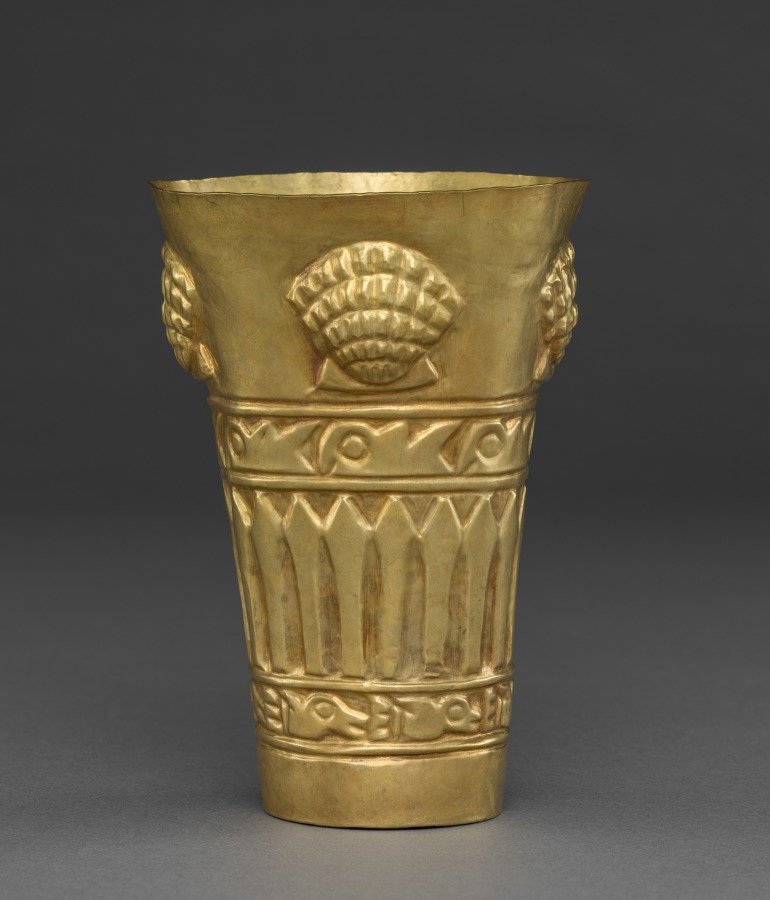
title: Beaker with Shells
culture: Central Andes (Peru), Lambayeque (Sicán) people, 10th century-12th century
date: 900–1100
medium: gold, hammered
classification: Metalwork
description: This beaker was created by an artist of the Lambayeque culture of Peru's north coast. Shells appear in the upper register representing spondylus, the red-orange thorny oyster greatly valued by pre-Hispanic Andean societies. If such beakers were used in life—that is, not created exclusively for the lavish tombs in which they have been found in quantities—they may have figured in feasting events that were central to late pre-Hispanic political, social, and religious life.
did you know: Highly valued as a luxury material, spondylus shells served as symbols of power and prestige.